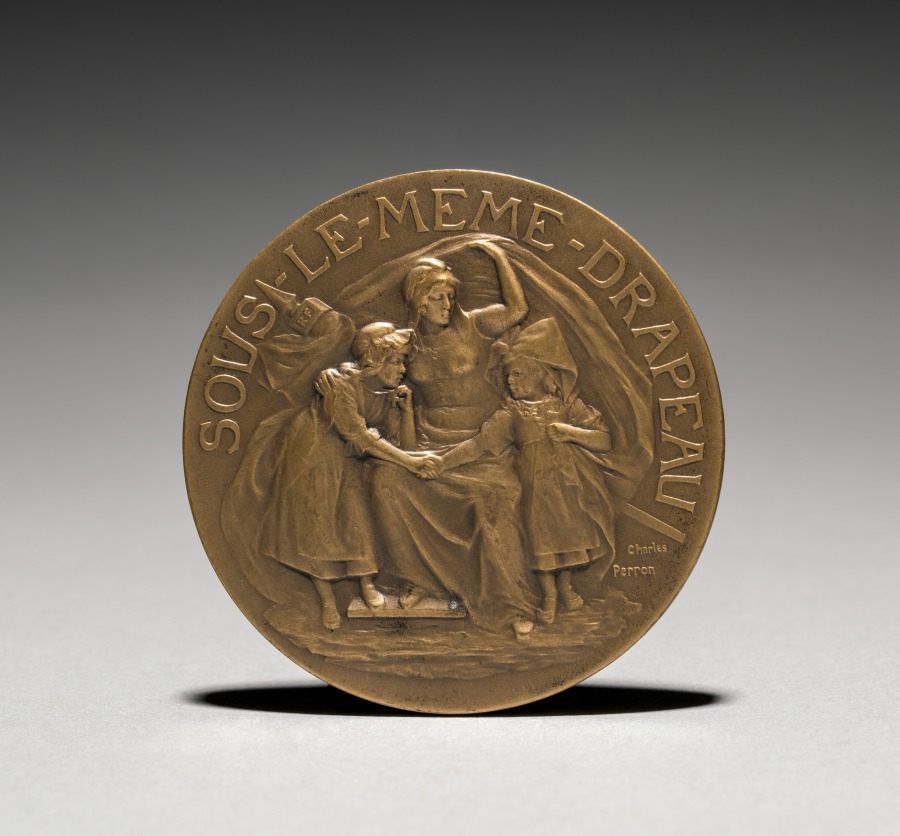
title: Medallion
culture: France, 19th-20th century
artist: Charles-Theodore Perron (French, 1862–1934)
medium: bronze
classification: Metalwork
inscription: "SOUS LE MEME DRAPEAU" (Under the Same Flag); signed: "Charles Perron."